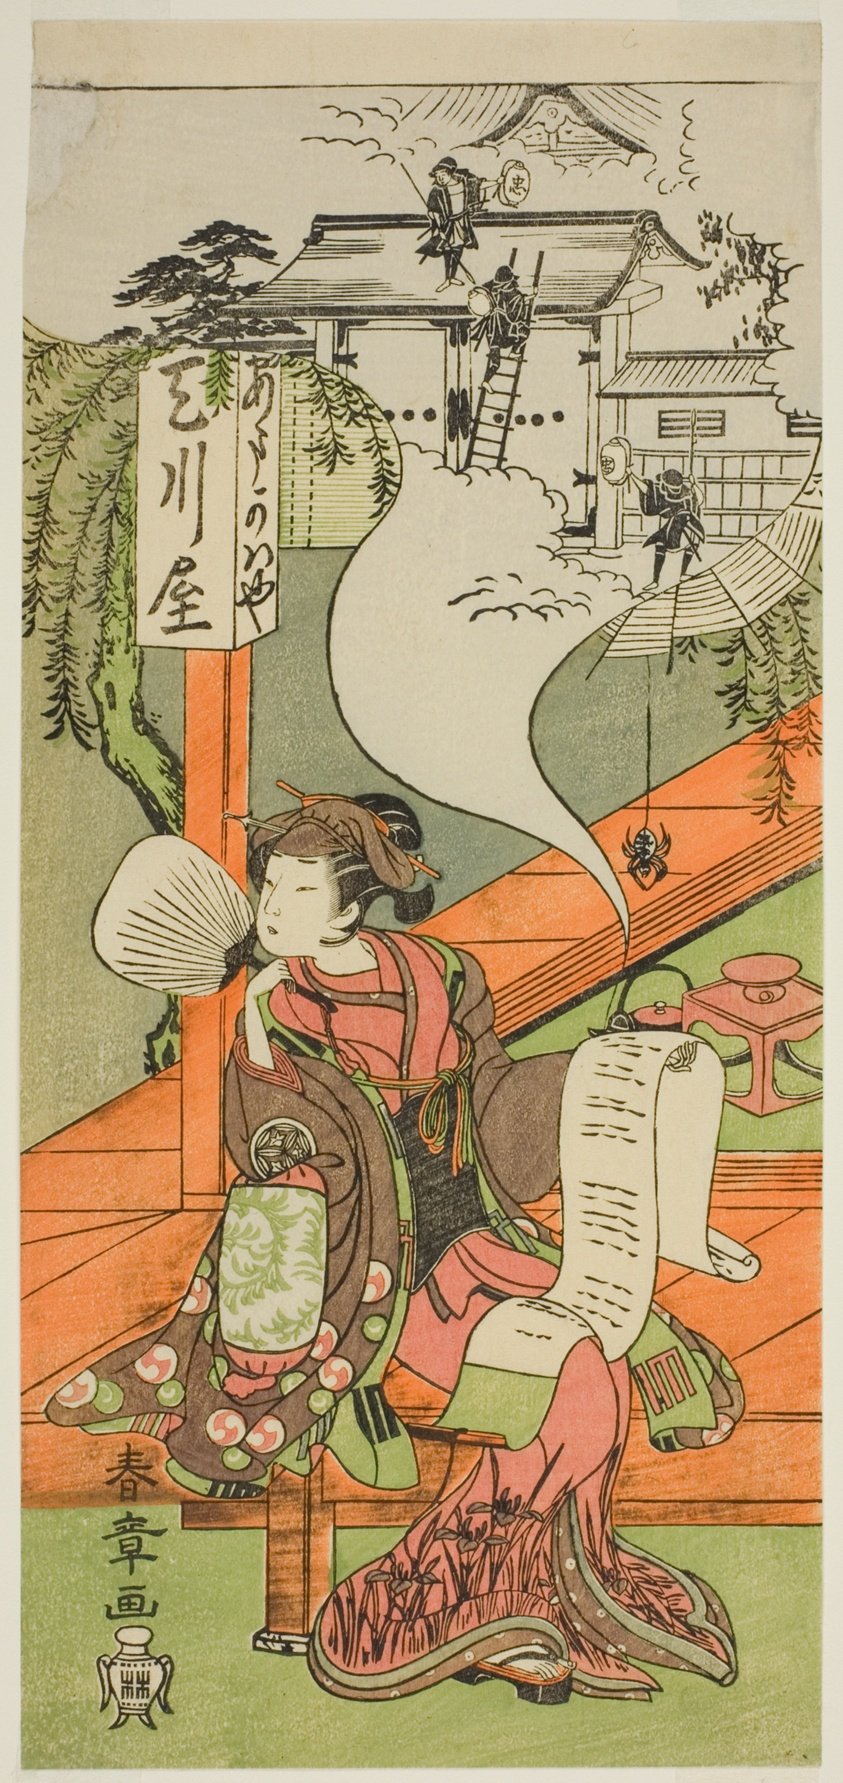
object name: Print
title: The Actor Yamashita Kinsaku II as Oishi (?) or Osono (?) in the Play Kanadehon Chushingura (?), Performed at the Nakamura Theater (?) in the Fifth Month, 1771 (?)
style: Japanese (culture or style)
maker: Katsukawa Shunsho 勝川 春章; Japanese, 1726-1792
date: c. 1771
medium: Color woodblock print; hosoban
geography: Japan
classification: woodblock print; print; asian art